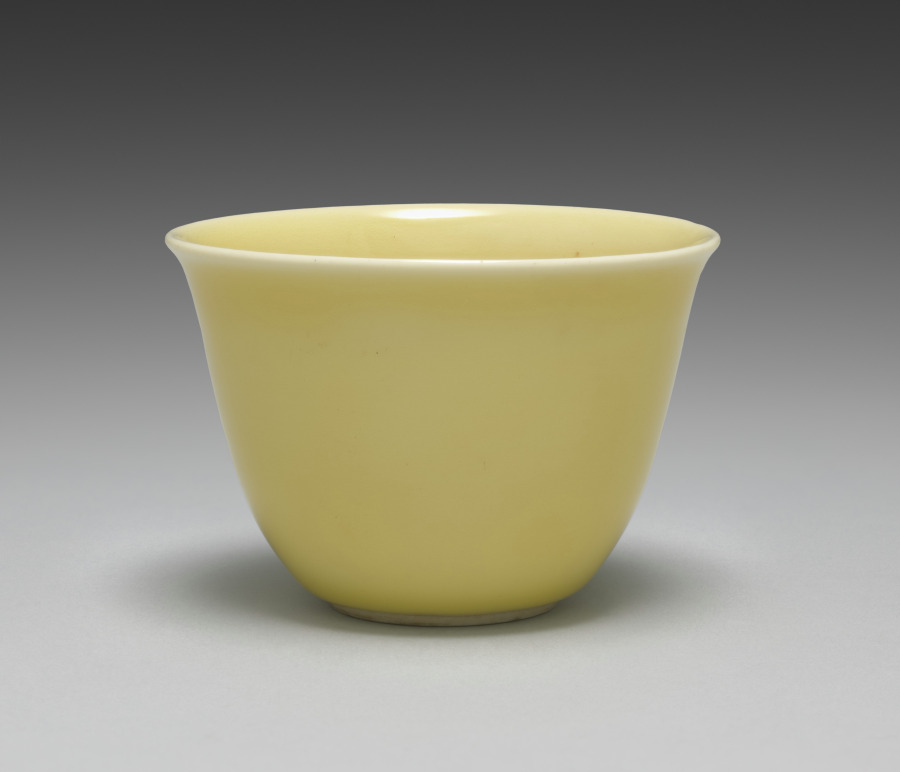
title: Cup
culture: Japan, Taishō period (1912–26) or Shōwa period (1926–89)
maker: Seifū Yohei IV (Japanese, 1872–1951)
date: 1914–46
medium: porcelain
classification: Ceramic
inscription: 清風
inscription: 清風造 【印】成山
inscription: 清風盧人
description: Like his father, Yohei IV also produced works with red or yellow monochrome glazes. His yellow-glazed works include this set of five drinking cups, a pair of sake pourers CMA 2022.216, and a sweets bowl molded into the shape of a chrysanthemum CMA 2022.218.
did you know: Seifū Yohei IV learned the ceramics industry from his father and painting from Tanomura Shosai.